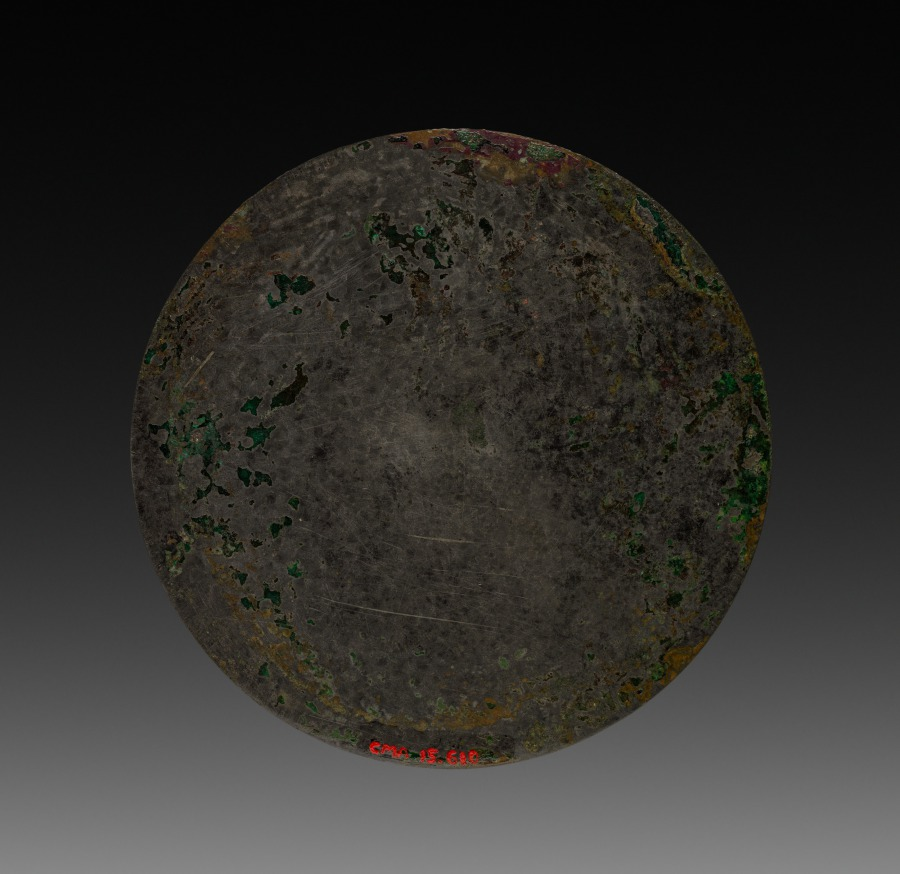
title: Mirror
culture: China, Han dynasty (202 BCE–220 CE)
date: 206 BCE–220 CE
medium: bronze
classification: Metalwork